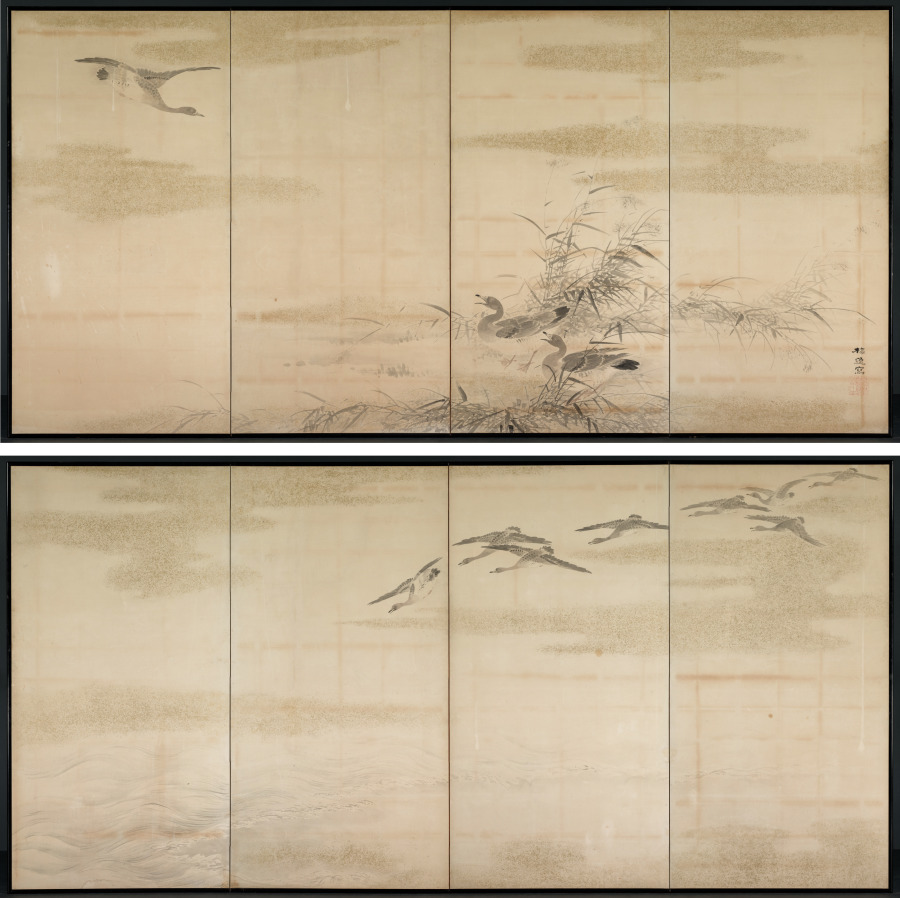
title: Geese, Reeds, and Water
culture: Japan, Edo period (1615–1868)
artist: Yamamoto Baiitsu (Japanese, 1783–1856)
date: 1800s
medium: Pair of four-panel folding screens; ink, color, and cut gold foil on paper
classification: Painting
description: This byōbu composition differs from most in that it comprises two four-panel screens, rather than two six-panel units. Since the current mounting is modern, it is impossible to determine whether its present configuration represents its original design. Some panels may have been removed to help the screens better fit into a modern interior space. Baiitsu worked almost exclusively in monochromatic ink tones and favored classical Chinese painting themes.